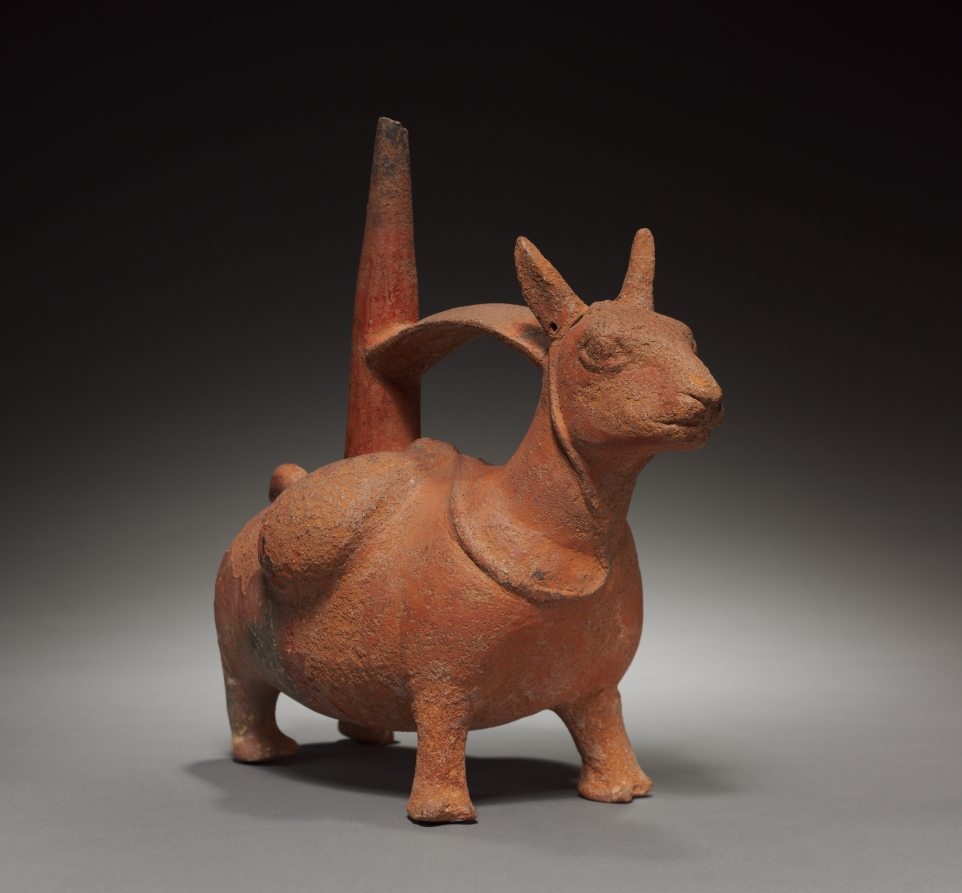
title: Llama with Packs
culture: Peru, Chimú or Inca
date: before 1532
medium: pottery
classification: Ceramic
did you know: The llama was the only burden-bearing animal, aside from humans, in ancient South America.